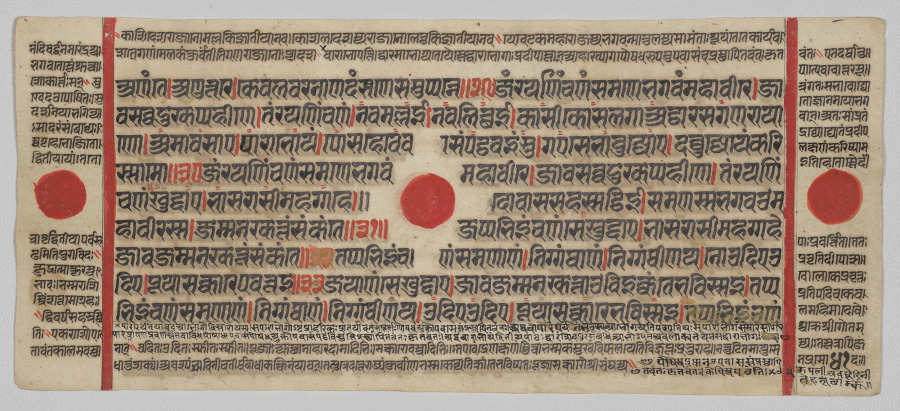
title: Text, Folio 41 (verso), from a Kalpa-sutra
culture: Western India, Gujarat, last quarter of the 15th century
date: c. 1475–1500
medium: Gum tempera, ink, and gold on paper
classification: Painting